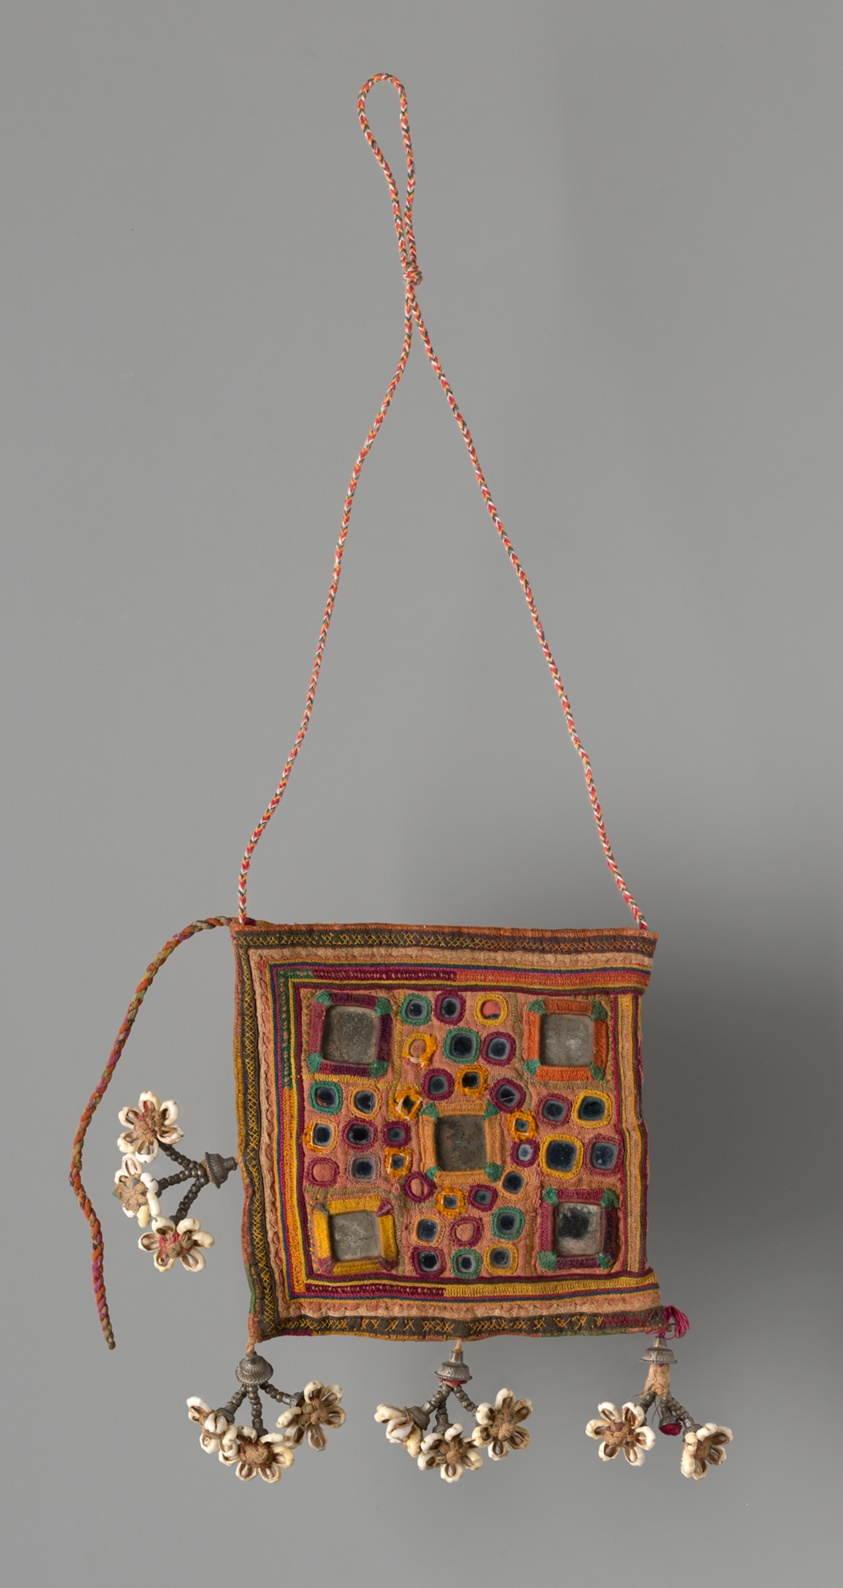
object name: Costume and Accessories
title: Bag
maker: Banjara (India, Rajasthan)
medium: Cotton, plain weave; embroidered with chain stitch, cross-stitch, herringbone stitch, and buttonhole stitch with applied mirrors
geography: India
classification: textile; needlework (visual works); costume